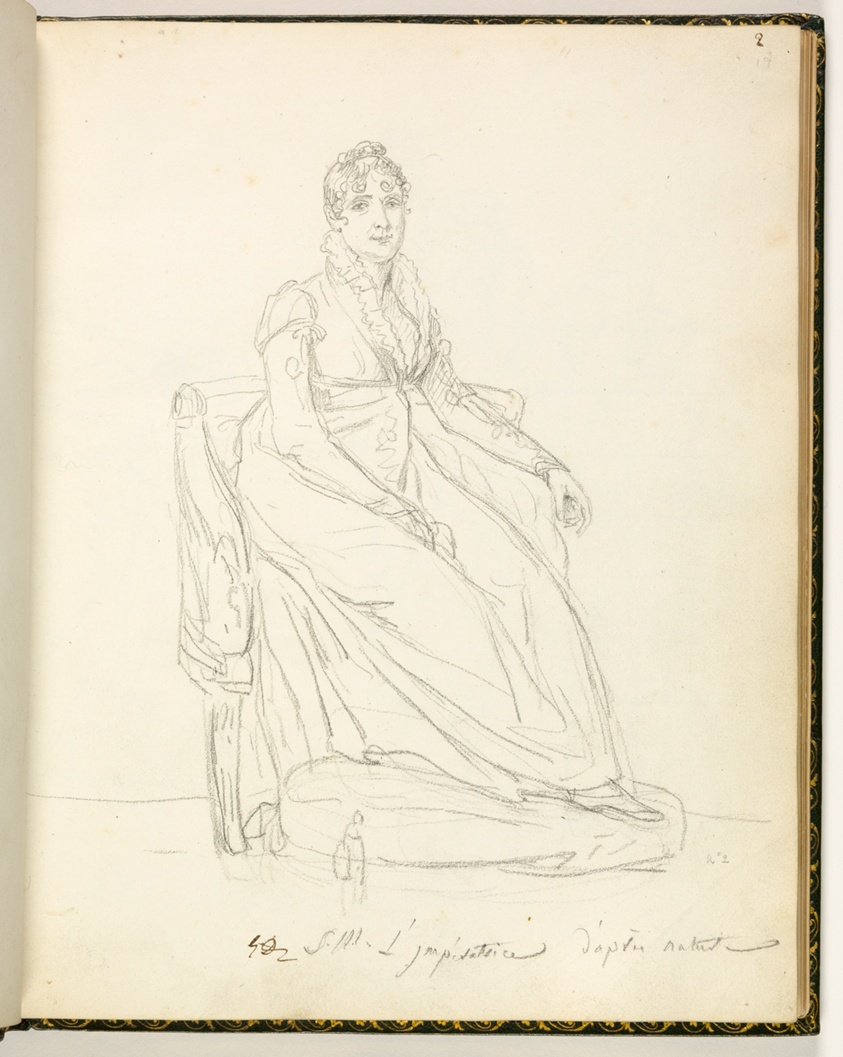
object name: Drawing and Watercolor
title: Sketchbook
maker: Jacques-Louis David; French, 1748-1825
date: 1809–10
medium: Graphite, black chalk, black crayon, and pen and brown ink drawings on wove paper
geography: France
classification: sketchbook; chalk; prints and drawing; paper